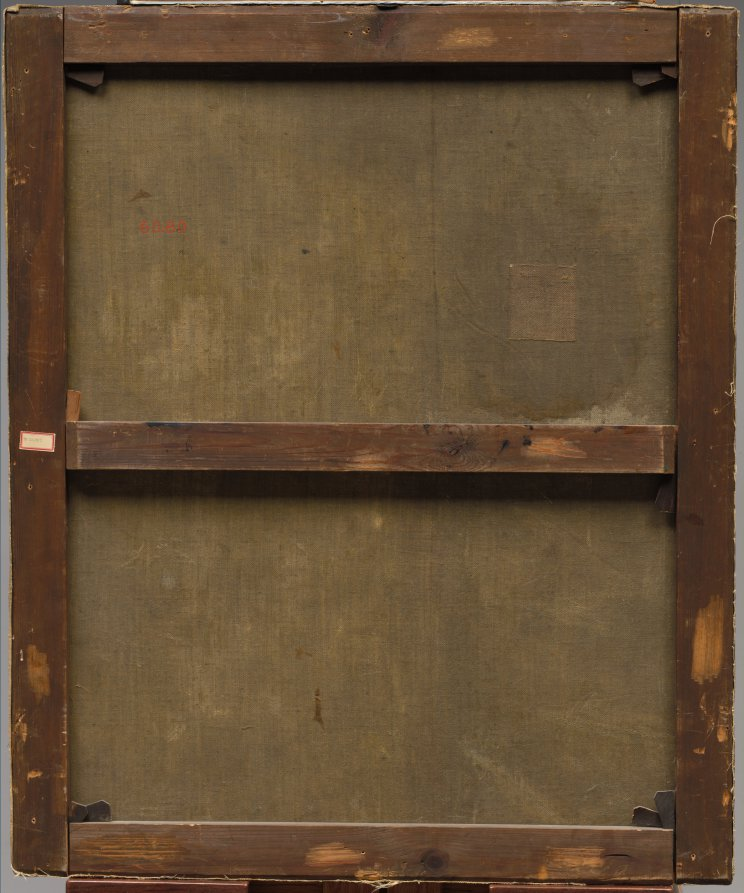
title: Silver Wine Jug, Ham, and Fruit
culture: Netherlands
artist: Abraham van Beyeren (Dutch, 1620/21–1690)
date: c. 1660–66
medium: oil on canvas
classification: Painting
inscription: Signed lower left: "AVB g. [monogram]"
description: With their typically large scale, and loose and energetic brushwork, Abraham van Beyeren’s opulent still life paintings were designed to be seen from a slight distance—perhaps installed over a mantelpiece. Here, for example, the silver wine jug is painted with rough strokes that seem almost abstract when viewed up close, but from a distance it becomes a fully realized object shimmering with complex reflections—including a ghostly self-portrait of the artist at his easel.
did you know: Look closely: the shimmering surface of the silver wine jug reflects a portrait of the artist at his easel.